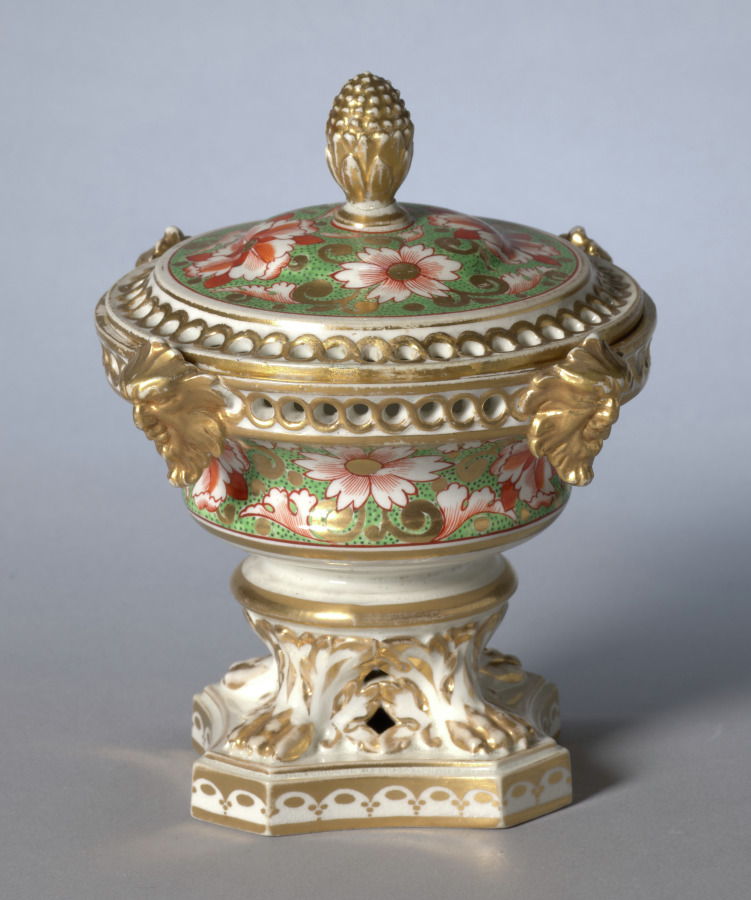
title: Potpourri Vase with Cover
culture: England, Derby, 19th century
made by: Derby (Crown Derby Period) (British)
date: c. 1810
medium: porcelain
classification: Ceramic